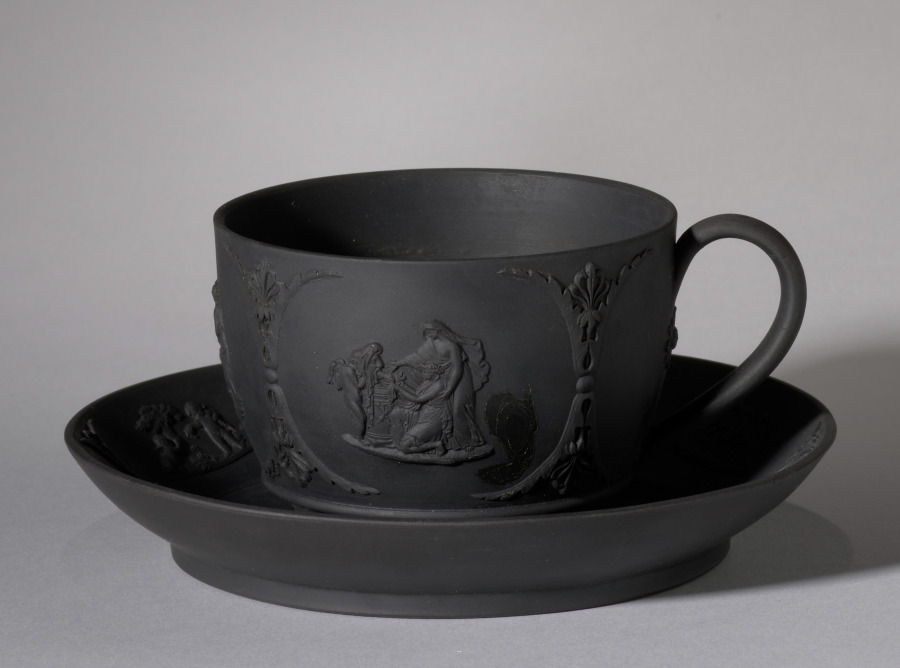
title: Cup and Saucer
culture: England, Staffordshire, 19th century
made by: Wedgwood Factory (British)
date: 1800s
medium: black basalt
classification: Ceramic